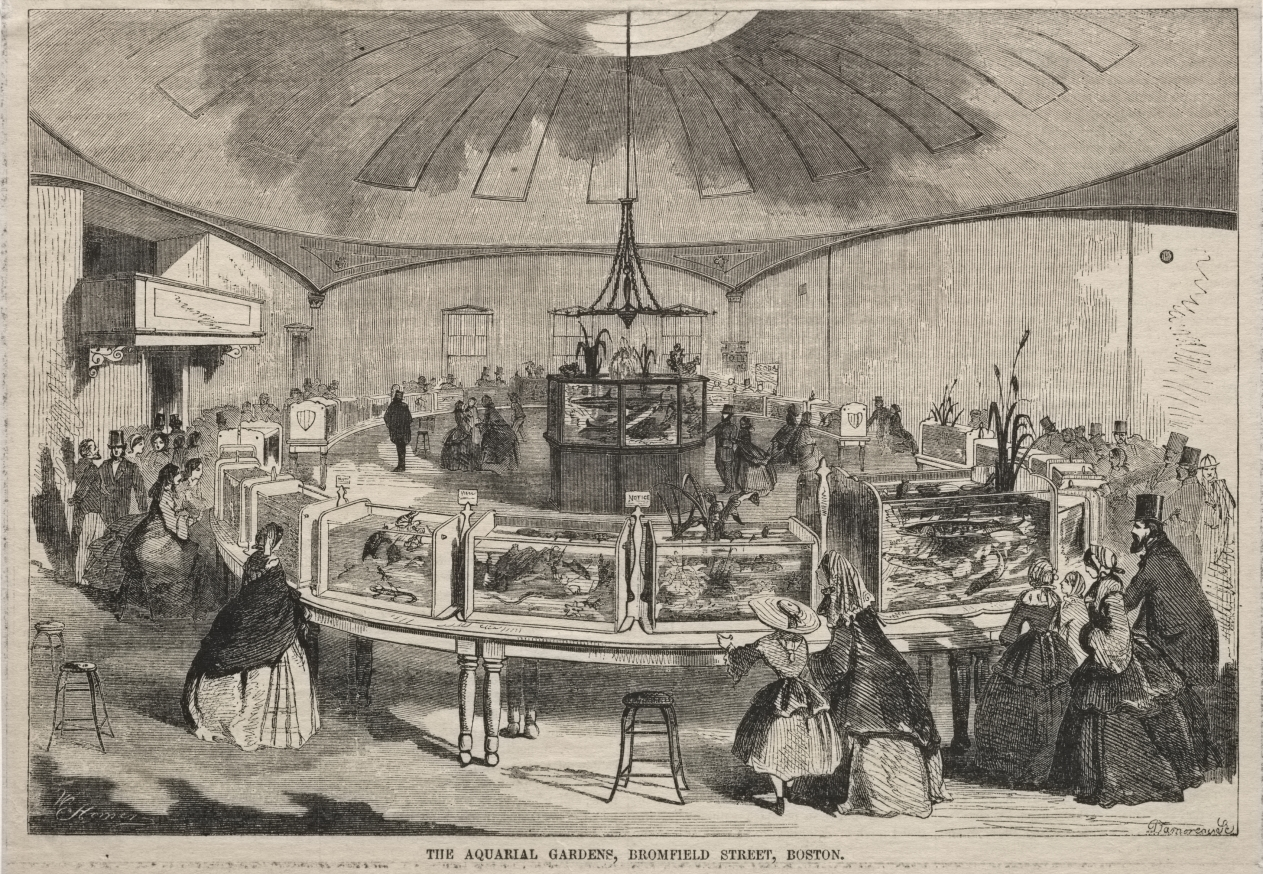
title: The Aquarial Gardens, Bromfield Street, Boston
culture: America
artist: Winslow Homer (American, 1836–1910)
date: 1859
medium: wood engraving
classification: Print